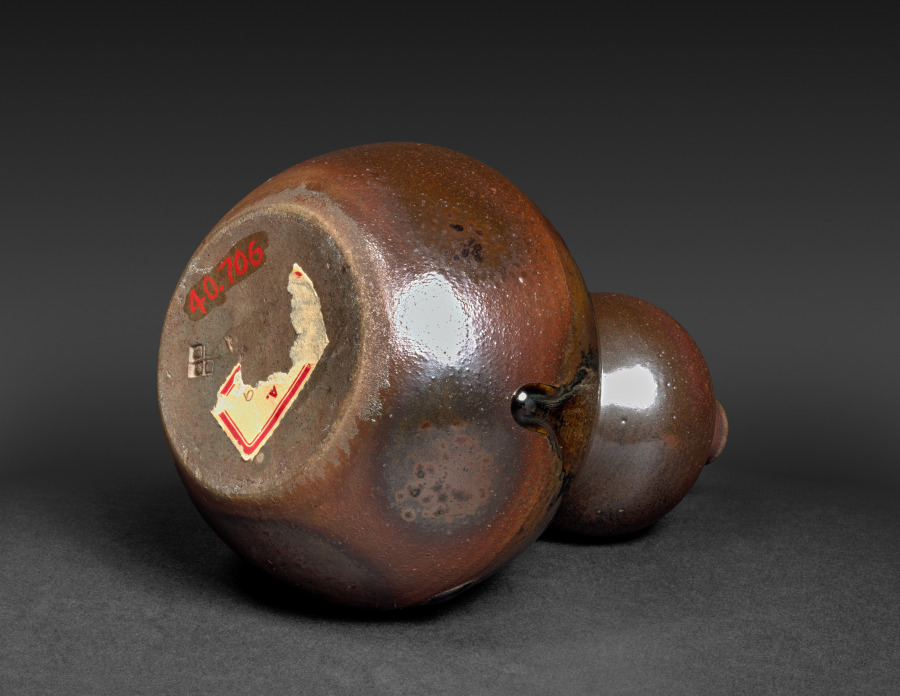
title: Double Gourd Jar with Wooden Stopple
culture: Japan, Edo period (1615–1868)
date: 1700s to mid-1800s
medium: stoneware (Bizen ware)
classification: Ceramic